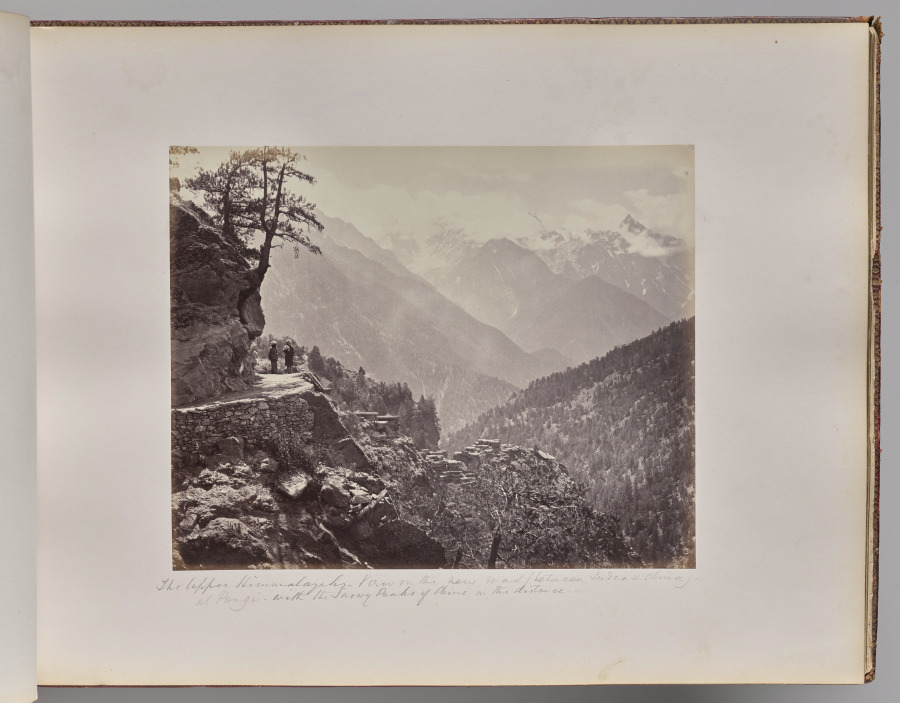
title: The Upper Himmalayahs. View on the New Road between India and China. Mt. Pangi with the Snowy Peaks of China in the Distance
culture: England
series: Photographs of Northern India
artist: Samuel Bourne (British, 1834–1912)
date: 1863–70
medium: albumen print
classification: Photograph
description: The 50 images in this album, all taken in the 1860s, move from the hill towns of the Himalayas down to cities including Lahore (now in Pakistan), Delhi, Lucknow, Agra, Benares (now Varansi), and Calcutta (now Kolkata). Architectural studies of major monuments offer valuable historical records of what sites such as the Taj Mahal and the imperial mosque of the Mughal emperors in Delhi looked like before 20th-century restorations.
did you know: Samuel Bourne, the author of most the images in this album, was a banker in England before he moved to India to become a professional photographer.